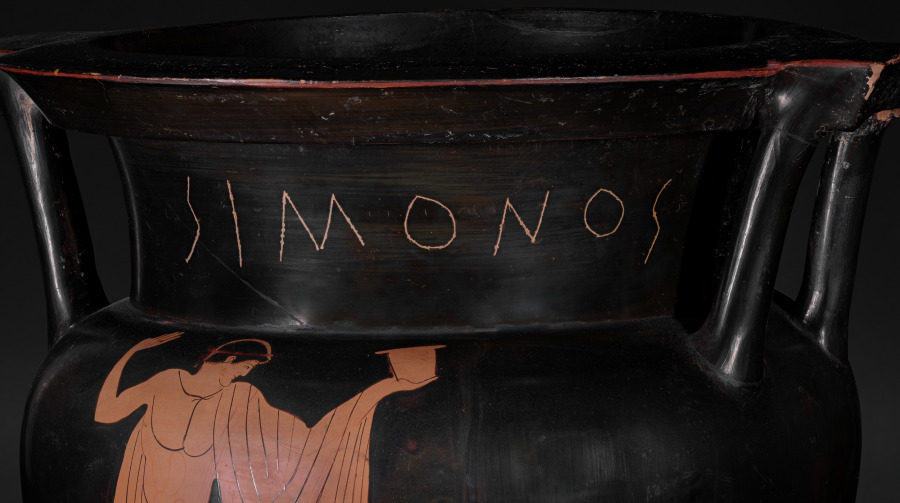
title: Red-Figure Column Krater (Mixing Vessel): Komos (Revel)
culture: Greek, Attic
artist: attributed to Pig Painter (Greek, Attic, active c. 480–460 BCE)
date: 470–460 BCE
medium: ceramic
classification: Ceramic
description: Used for mixing wine and water at a symposium (or drinking party), this column-krater speaks to the perils and pleasures of drinking. On one side, a bearded man holding a staff and a drinking cup leans forward, a red stream of vomit falling from his mouth. Before him is a nude young boy, holding a tortoiseshell lyre and a basket or pail. On the other side, a young man dances, holding a deep cup and wearing just one boot. On the neck above him, scratched in large letters, is the name SIMONOS, probably indicating that the vase once belonged to someone named Simon.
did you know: The bearded man on this vase is vomiting—perhaps a humorous warning against over imbibing.